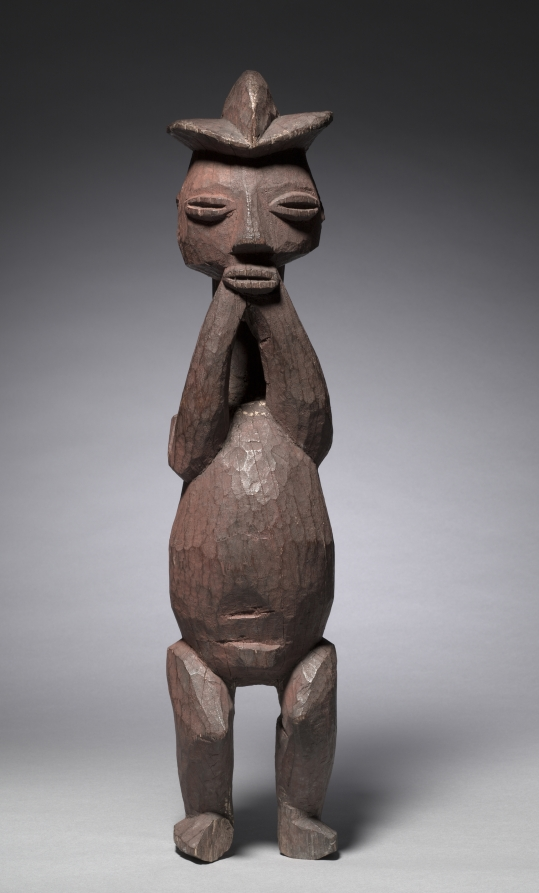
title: Male Figure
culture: Africa, Central Africa, Democratic Republic of Congo, Hungaan-style maker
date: mid- to late 1800s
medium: Wood and colorant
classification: Sculpture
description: Hungaan figures of this size served as guardians of ritual shrines and functioned in rituals to promote fertility, guarantee well-being, and ensure longevity. The striking crested hairstyle imitates a real coiffure or a wig, indicative of status and prestige. The hands supporting the chin identify the figure as a chief who is immersed in thought and contemplation, pondering over his responsibilities.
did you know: The red powdery surface of this figure mimics a red body adornment that mixed ground camwood with palm oil.